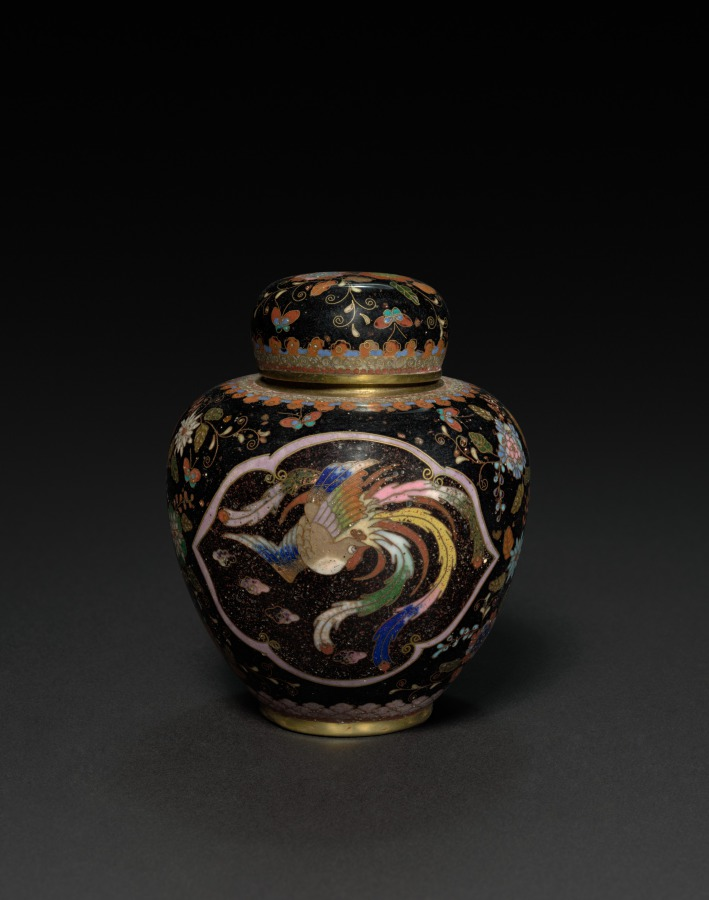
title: Ginger Jar with Phoenix and Dragon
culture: Japan, Meiji period (1868–1912) or Taishō period (1912–26)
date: early 1900s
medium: cloisonne enamel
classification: Enamel